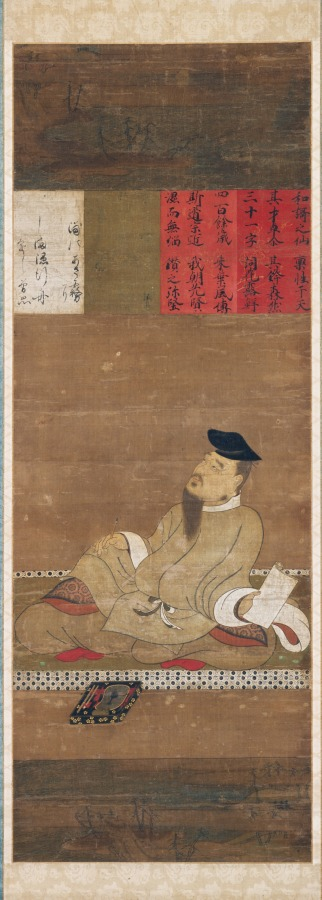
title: Kakinomoto no Hitomaro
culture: Japan, Kamakura period (1185–1333)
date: early 1300s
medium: hanging scroll; ink and color on silk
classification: Painting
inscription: 浦のあさ霧にしま隠れゆく舟をしぞ思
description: Among Japan’s greatest poets, Kakinomoto no Hitomaro’s (c. 660–724) portrait was often displayed at poetry competitions. Here, he gazes up at a falling cherry blossom, his writing box before him, brush and paper in his hands. A short biography and one of his poems are inked on painted rectangles meant to look like decorated papers. The first part of the poem has been mostly lost, but from what remains, it is possible to recognize it as Dimly, dimly in the morning mist that lies over Akashi Bay, my longings follow with the ship that vanishes behind the distant isle. —Translated by Robert H. Bower and Earl Roy Miner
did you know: The landscapes at the top and bottom of the painting depict Akashi Bay, with its famous pines along the shore, and a lone figure in a boat.